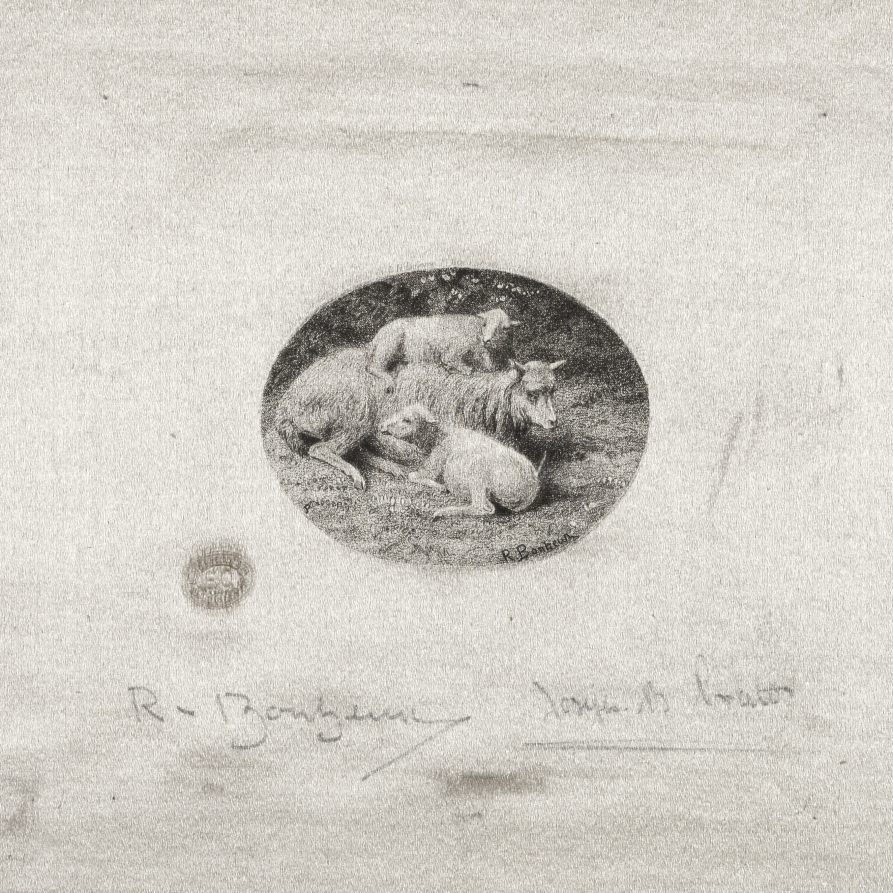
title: Sheep and Lambs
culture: 19th century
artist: Joseph Bishop Pratt (American, 1854–1910)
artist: after Rosa Bonheur (French, 1822–1899)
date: 1893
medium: etching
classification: Print